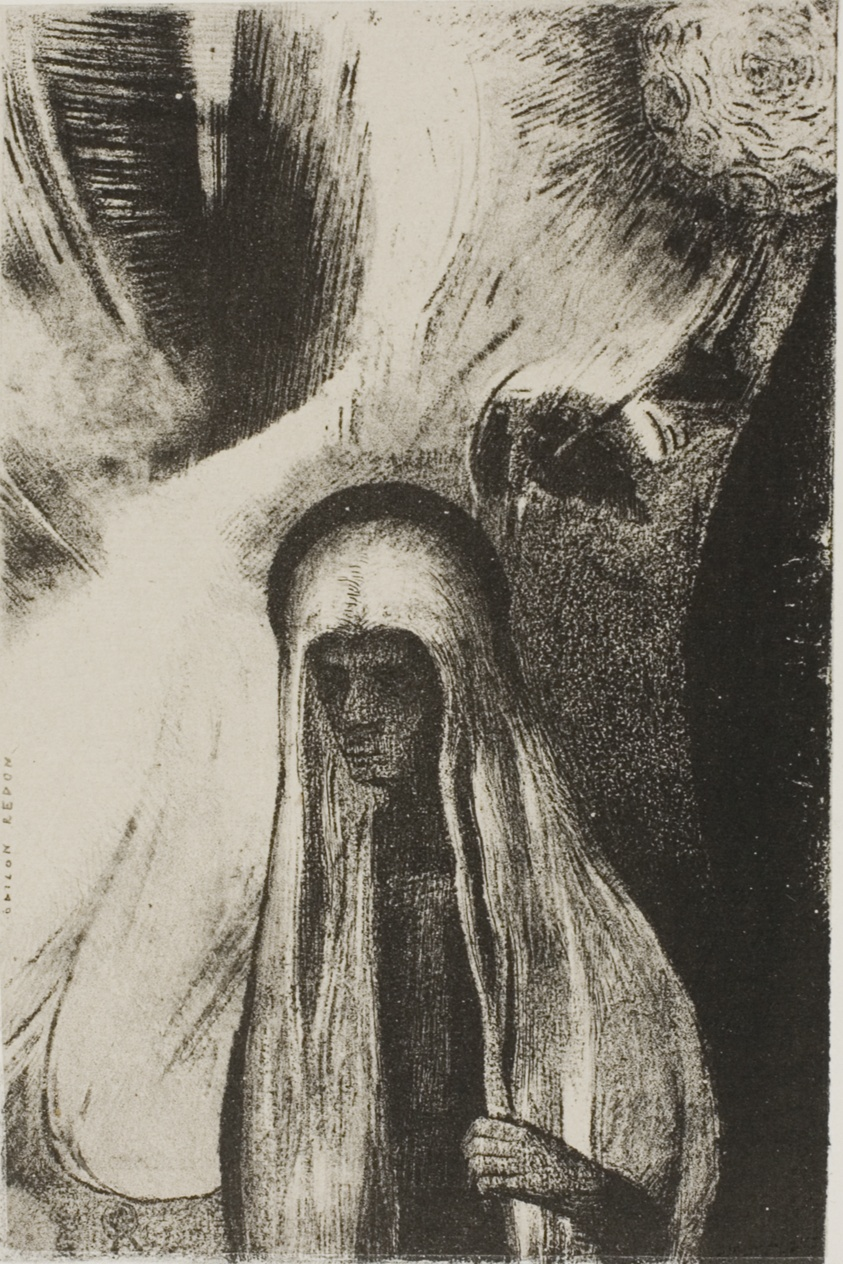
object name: Print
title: The Old Woman: "What are you afraid of? A wide black hole! It is empty, perhaps?", plate 19 of 24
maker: Odilon Redon (French, 1840-1916)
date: 1896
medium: Lithograph in black on light-gray China paper laid down on ivory wove paper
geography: France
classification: lithograph; print; prints and drawing; paper